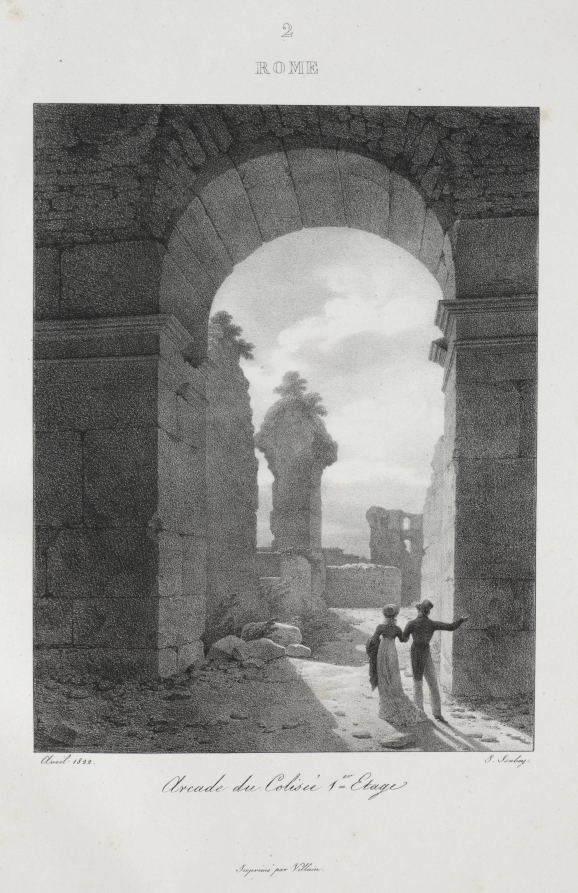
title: Voyage en Italie en 1822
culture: France, 19th century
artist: Jean-Baptiste Isabey (French, 1767–1855)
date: 1833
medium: lithograph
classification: Bound Volume